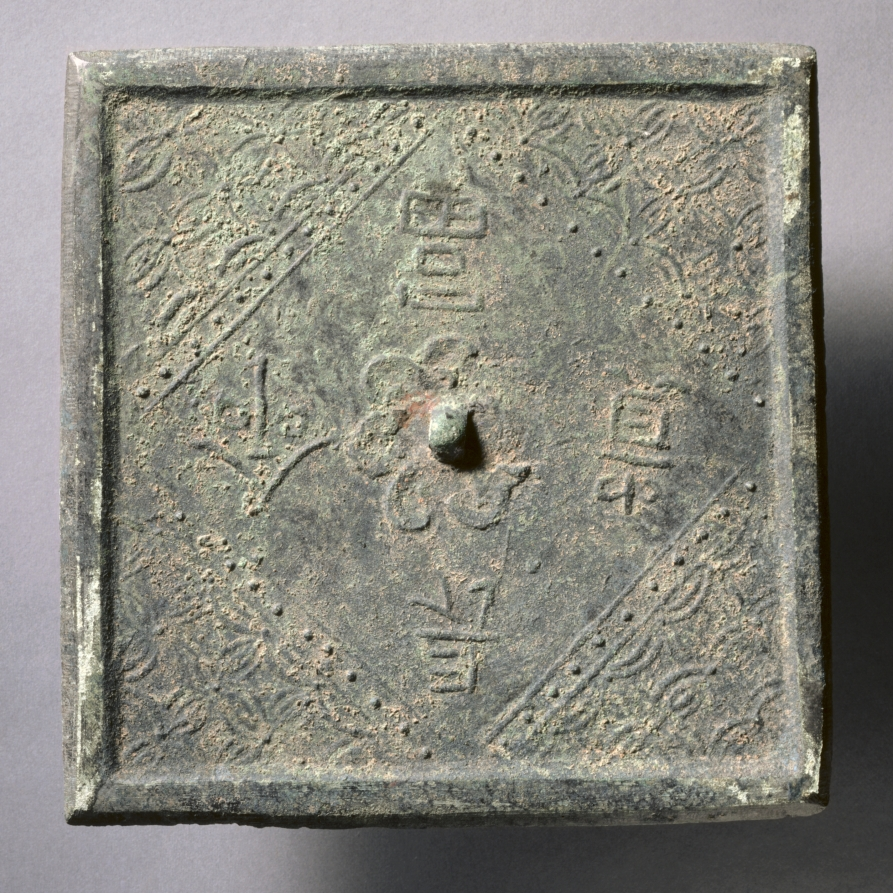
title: Square Mirror with Felicitous Message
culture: China, Song dynasty (960-1279)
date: early 900s–late 1200s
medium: bronze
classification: Metalwork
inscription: [May you enjoy] a long life, health, and fortune.